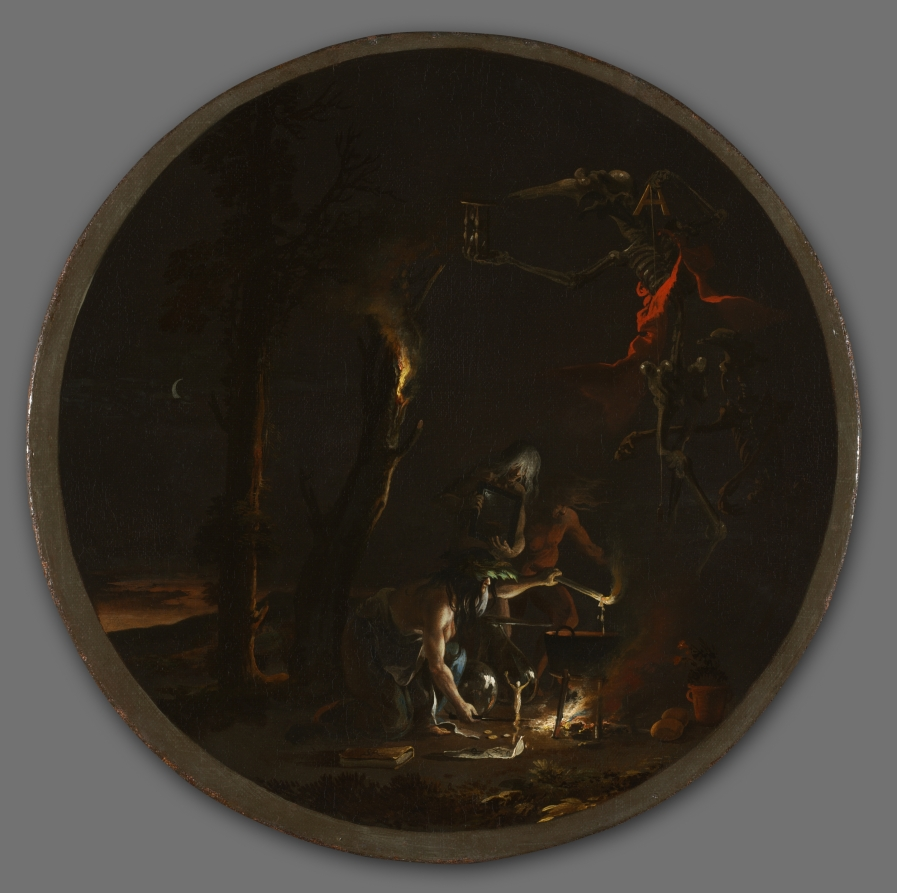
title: Scenes of Witchcraft: Evening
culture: Italy, 17th century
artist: Salvator Rosa (Italian, 1615–1673)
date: c. 1645–49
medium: oil on canvas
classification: Painting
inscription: Signed: "SR [monogram]"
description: At dusk, Rosa's hags gather around a cauldron. Above their incantations soars a conjured skeleton holding an hourglass symbolizing the brevity of life. In its left hand, the demonic creature holds a capital letter A from which extends a plumb line; as ancient signs of the moon and judgment, this strange combination of symbols embodies the nocturnal judgment the witches are doling out below. Though more rare in paint, the detailed portrayal of witches at their spells enjoyed a long literary tradition. The wax effigy alludes to classical literature by Virgil and Horace that described love magic. Poets in the 1500s and 1600s continued the tradition, writing verse about witches concocting potions and performing love spells. In Rosa's own poem "La Strega (The Witch)," the jilted Phyllis vows to take revenge on her feeble lover, listing the ingredients for her black magic: "ground powders, mystic gems, snakes and owls, stinking blood. . . ." Painting was considered "mute poetry" in the 1600s, and Rosa often explored the same themes in his written and painted art—a clever way to gain fame as a unique intellect.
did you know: The artist chose the painting's shape to reference the foundational role of the circle in practicing magic.